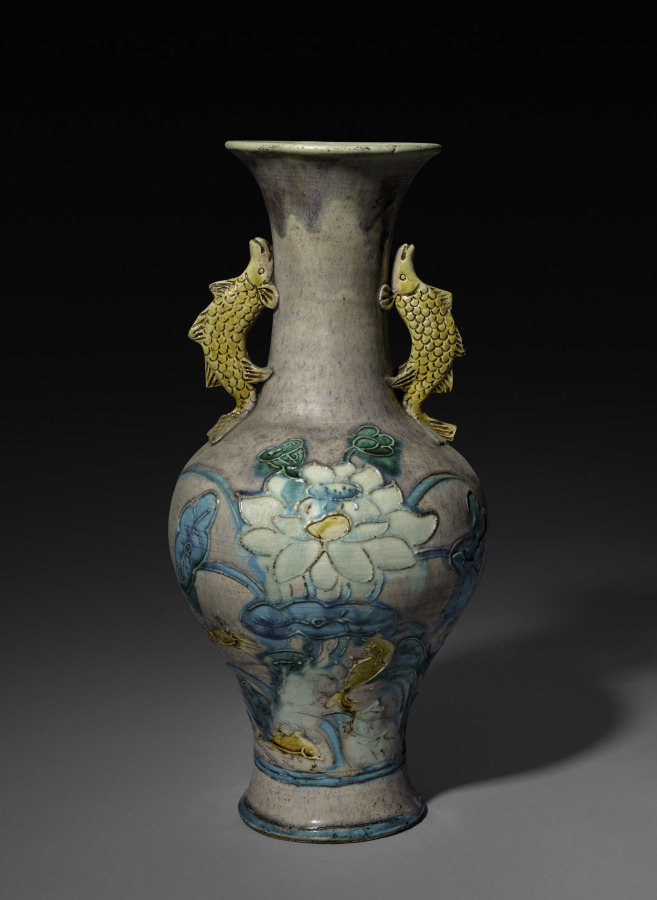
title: Beaker Vase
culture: China, Shanxi province, Ming dynasty (1368-1644)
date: 1368–1644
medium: Porcelain, Fahua ware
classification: Ceramic